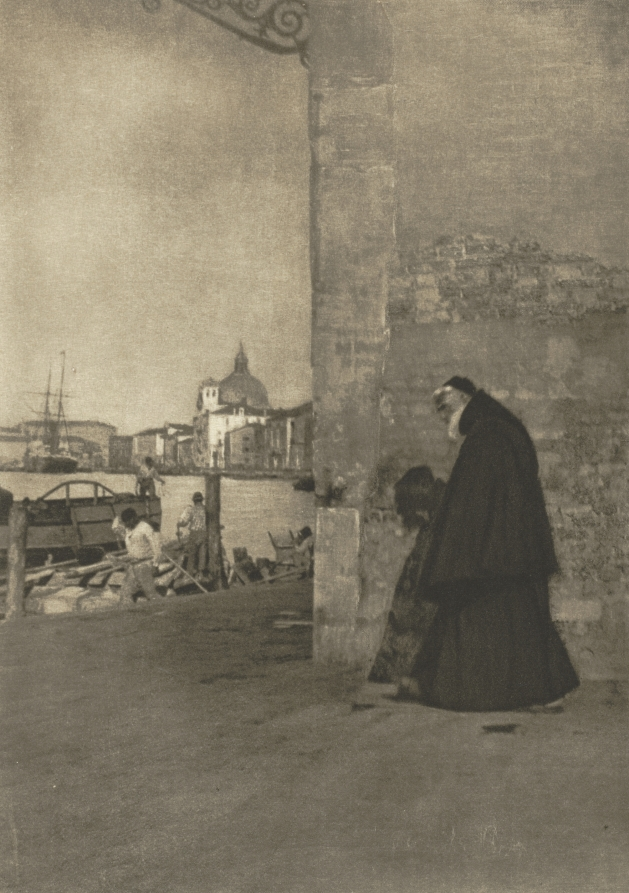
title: Camera Work: A Franciscan, Venice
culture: England, 20th century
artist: J. Craig Annan (British, 1864–1946)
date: 1904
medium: photogravure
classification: Bound Volume